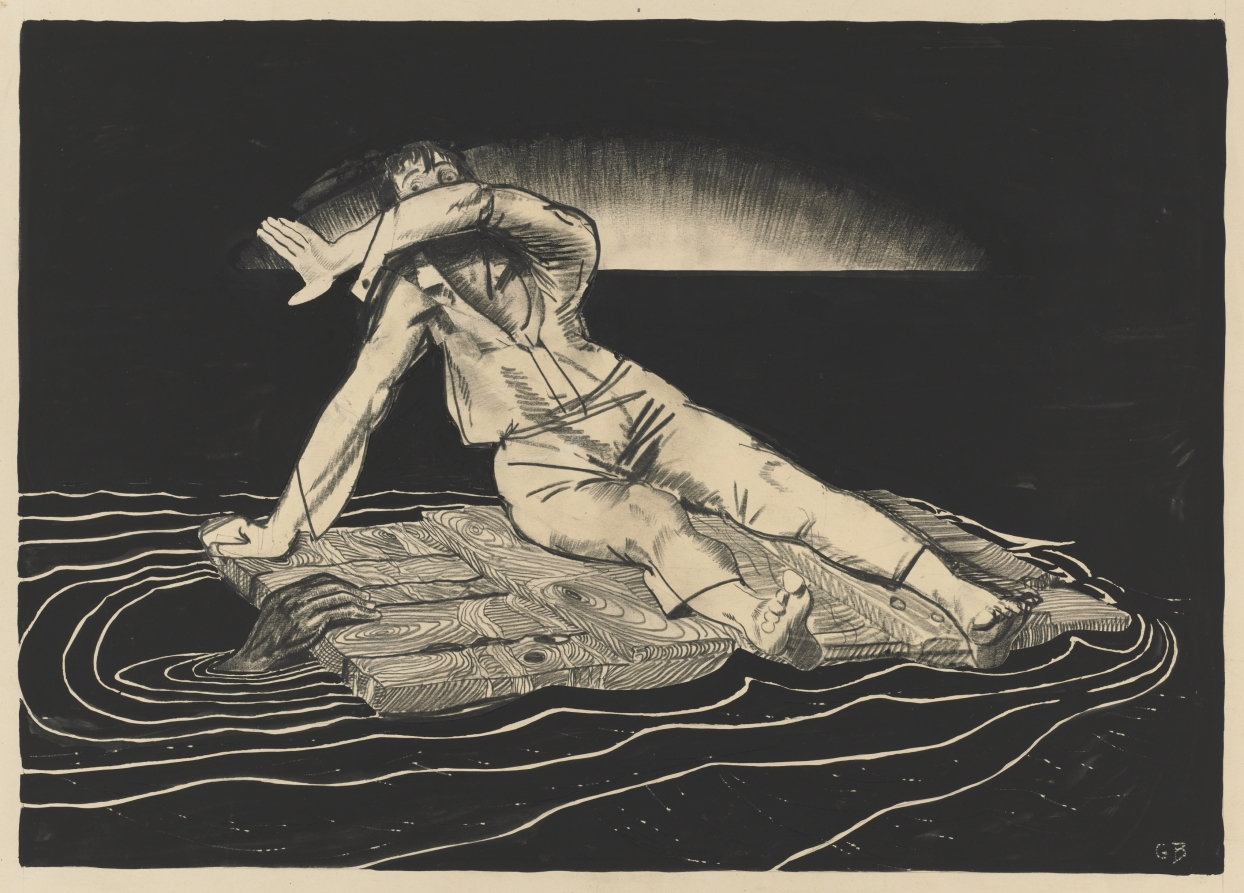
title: On a Raft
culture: America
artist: George Bellows (American, 1882–1925)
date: c. 1900–1923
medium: pen and ink and brush and conté crayon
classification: Drawing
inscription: Lower right corner, monogram G.B. scratched through ink